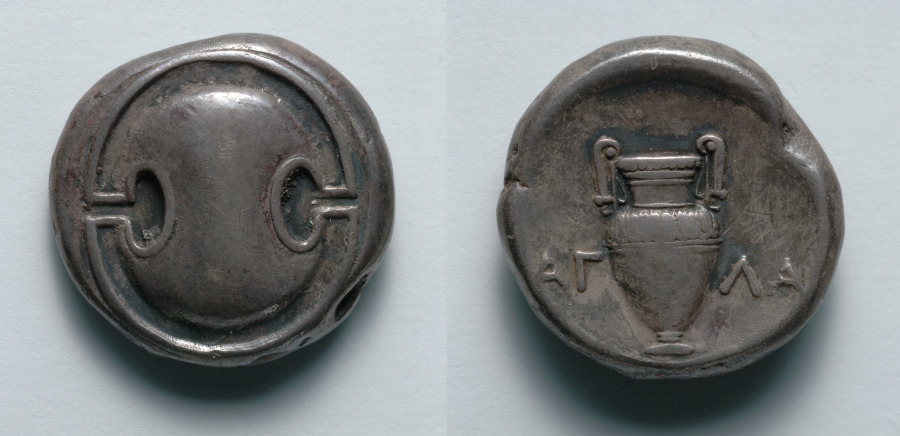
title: Stater: Boeotian Shield (obverse); Volute Krater (reverse)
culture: Greek, minted at Thebes (Boiotia)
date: 379–338 BCE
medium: silver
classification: Coins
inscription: ΑΓ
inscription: ΛΑ